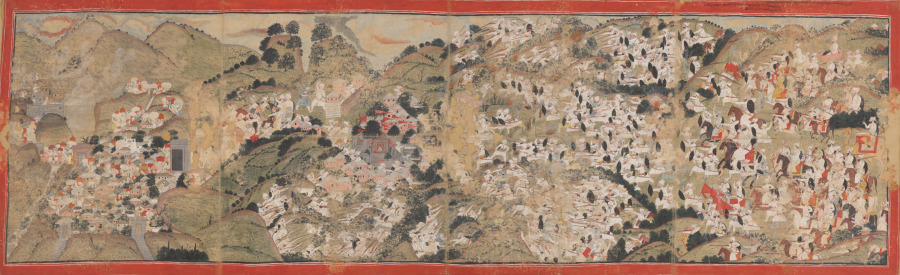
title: Raja Sansar Chand attacking Kangra Fort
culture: Northern India, Pahari kingdom of Kangra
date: after 1782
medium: Gum tempera, ink, and gold on cotton cloth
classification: Painting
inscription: Inscriptions in Takri and Persian. Persian reads: “On the 23rd of the month of Kartik, Samvat 1839 (1782 AD) Sri Maharaja Sansar Chand Bahadur attached Lakkarkot (Nagrakot ?) and the fortress of Kangra, attained victory and made siege intrenchments at the fortress of Kot Kangra.”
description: In 1782, the 17-year-old king of Kangra fought to retake his ancestral kingdom from the Mughals, who had controlled the territory since 1620. He rides a dark brown horse in front of the camel at the far right, blending in among his army and allies. The leftmost panel shows the residents of Kangra fleeing the conflict with their belongings on their heads to the safety of the fortress at the far left, from the walls where cannons are being fired. The main temple, built of gray stone, is in the middle of the composition, marked by red flags.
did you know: The king is 17 years old, beardless, riding a dark brown steed in front of the camel at the far right.